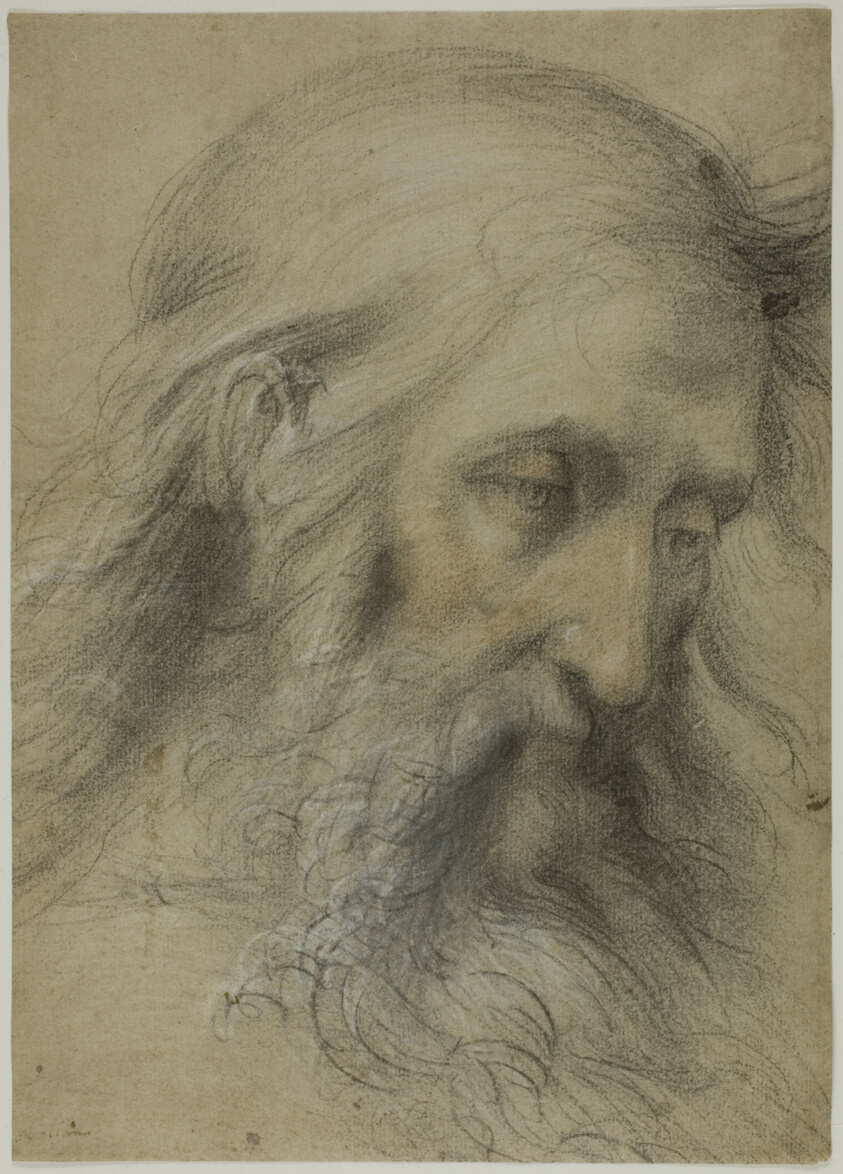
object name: Drawing and Watercolor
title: Head of Saint John the Evangelist: Study for the Disputation on the Immaculate Conception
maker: Giovanni Antonio Sogliani; Italian, 1492-1544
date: 1531/36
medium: Black and red chalks heightened with white chalk on ivory laid paper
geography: Italy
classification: chalk; drawings (visual works); prints and drawing